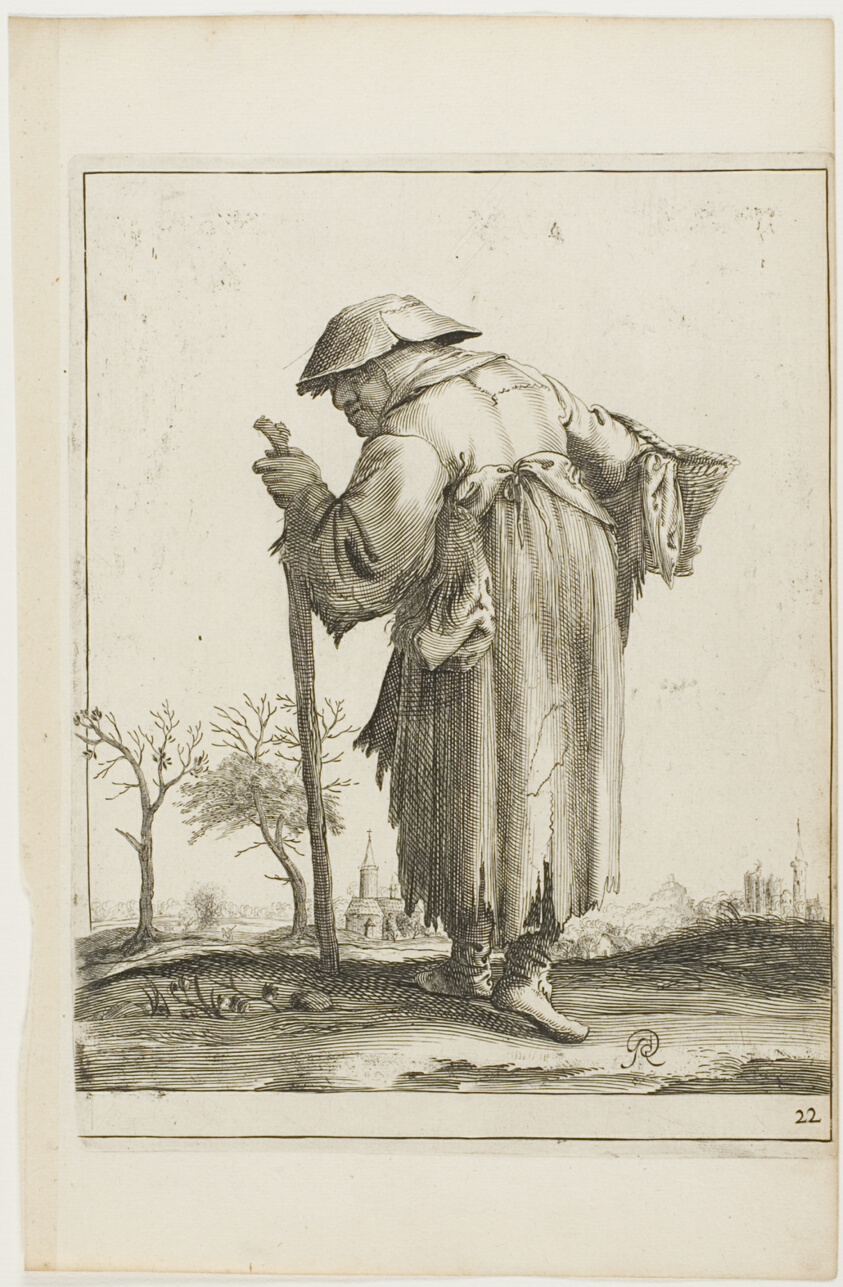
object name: Print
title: Marching Beggar Woman with a Basket, from T is al verwart-gaern (It's already confusing)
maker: Pieter Jansz Quast; Dutch, 1606-1647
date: 1634/38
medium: Engraving, with etching, on cream laid paper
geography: Netherlands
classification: engraving; paper; print; prints and drawing